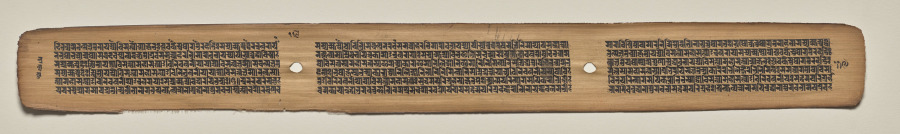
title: Text, Folio 119 (verso), from a Manuscript of the Perfection of Wisdom in Eight Thousand Lines (Ashtasahasrika Prajnaparamita-sutra)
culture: Eastern India, Bihar, Vikramashila Monastery. Painting: Nepal, Kathmandu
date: Sunday, September 14, 1119 (year 239 of the Newar Samvat in the month of Ashvina)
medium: gum tempera and ink on palm leaves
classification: Painting